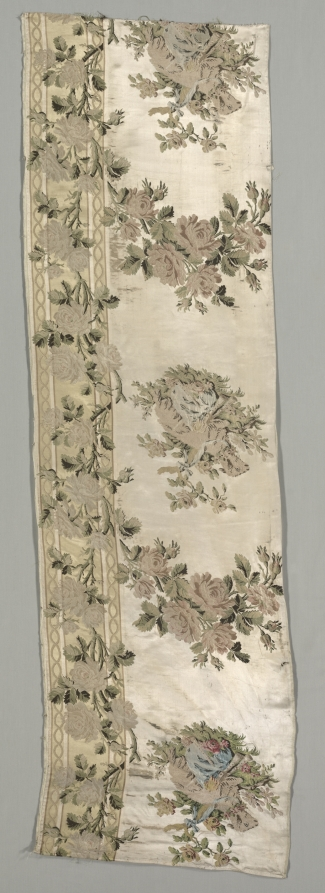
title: Length of Brocaded Satin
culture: France, 18th century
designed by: Philippe de Lasalle (French, 1723–1805)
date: c. 1780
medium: satin, brocaded; silk with areas of chenille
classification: Textile